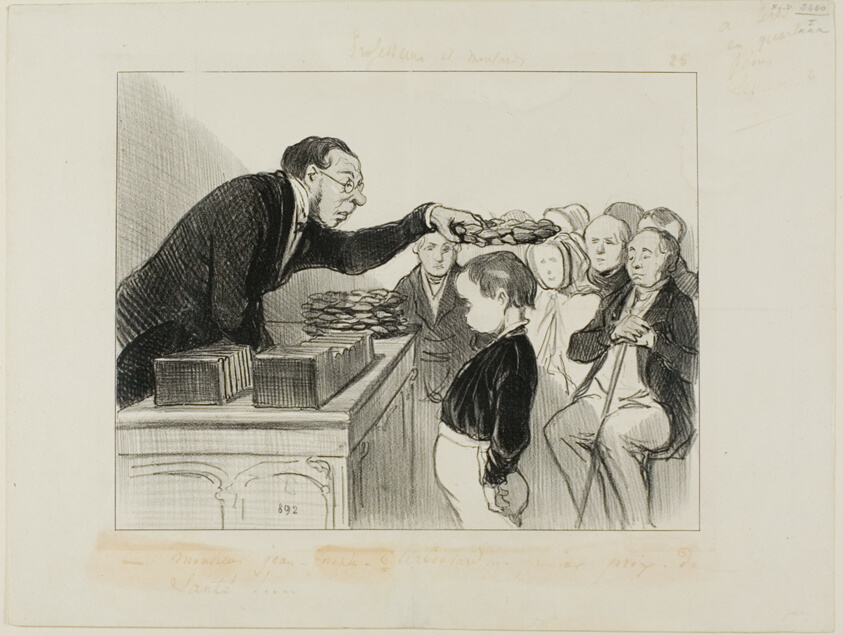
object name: Print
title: Mr. Jean-Joseph-Chaboulard... first prize for good health!, plate 28 from Professeurs et Moutards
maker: Honoré Victorin Daumier (French, 1808-1879); printed by Aubert & Cie. (French, active 19th century); later published in Le Charivari (French, 1832-1915)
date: 1846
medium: Lithograph in black on white wove paper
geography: France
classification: lithograph; print; prints and drawing